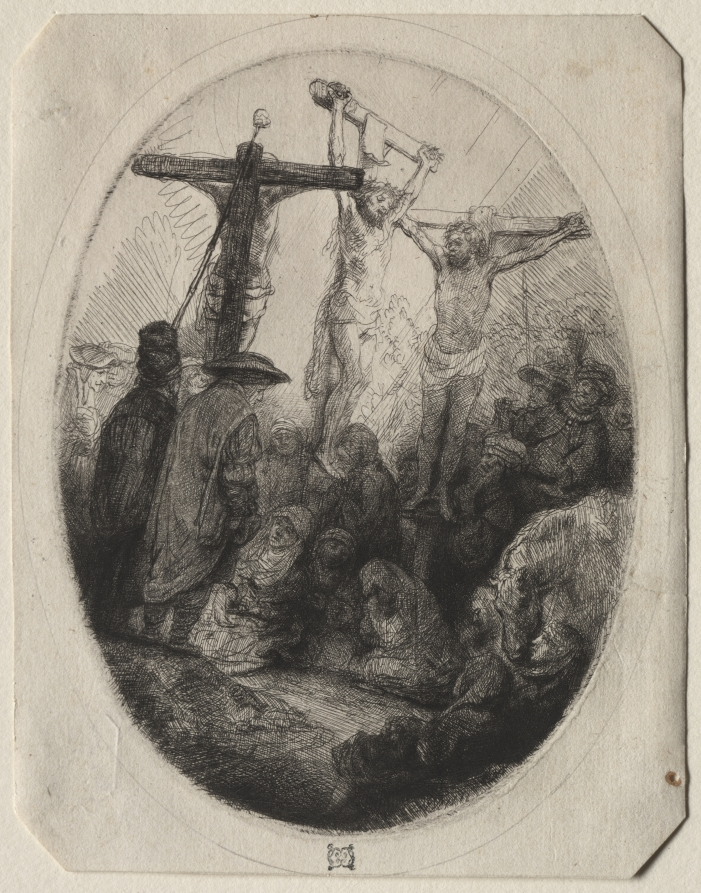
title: Christ Crucfied Between Two Thieves: An Oval Plate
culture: Netherlands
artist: Rembrandt van Rijn (Dutch, 1606–1669)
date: c. 1641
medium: etching and drypoint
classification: Print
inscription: VERSO, upper left, in graphite: [8?]1 ; lower left, in graphite; B. 79 ; lower left, in graphite: B. 48[crossed out] ; lower right, in graphite: 13B d/71